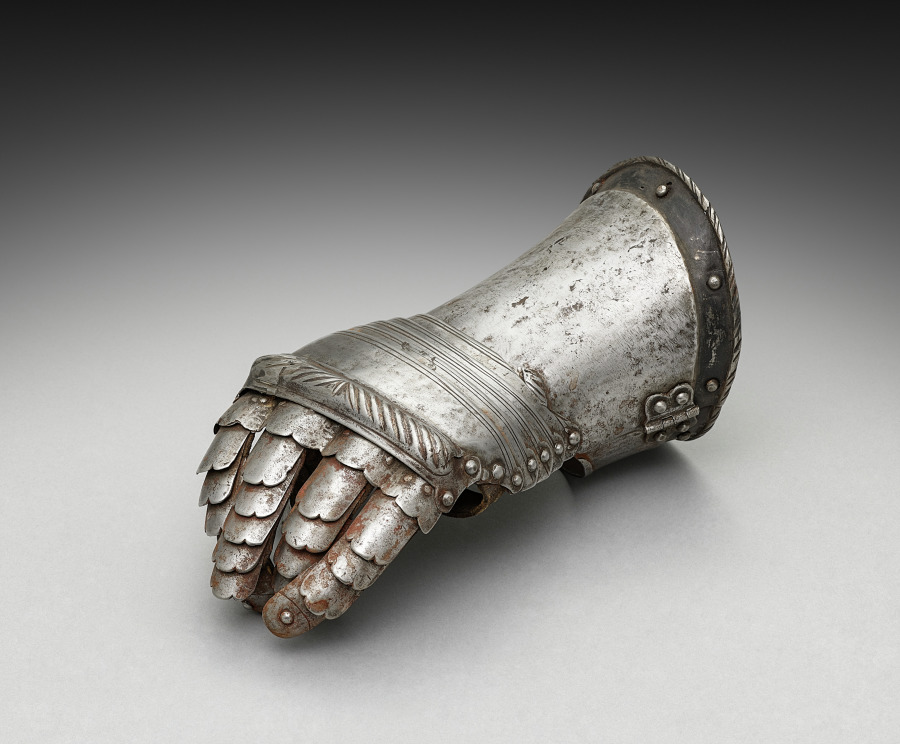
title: Left Gauntlet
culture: Germany, 19th century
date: 1801–1900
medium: steel with black paint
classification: Arms and Armor